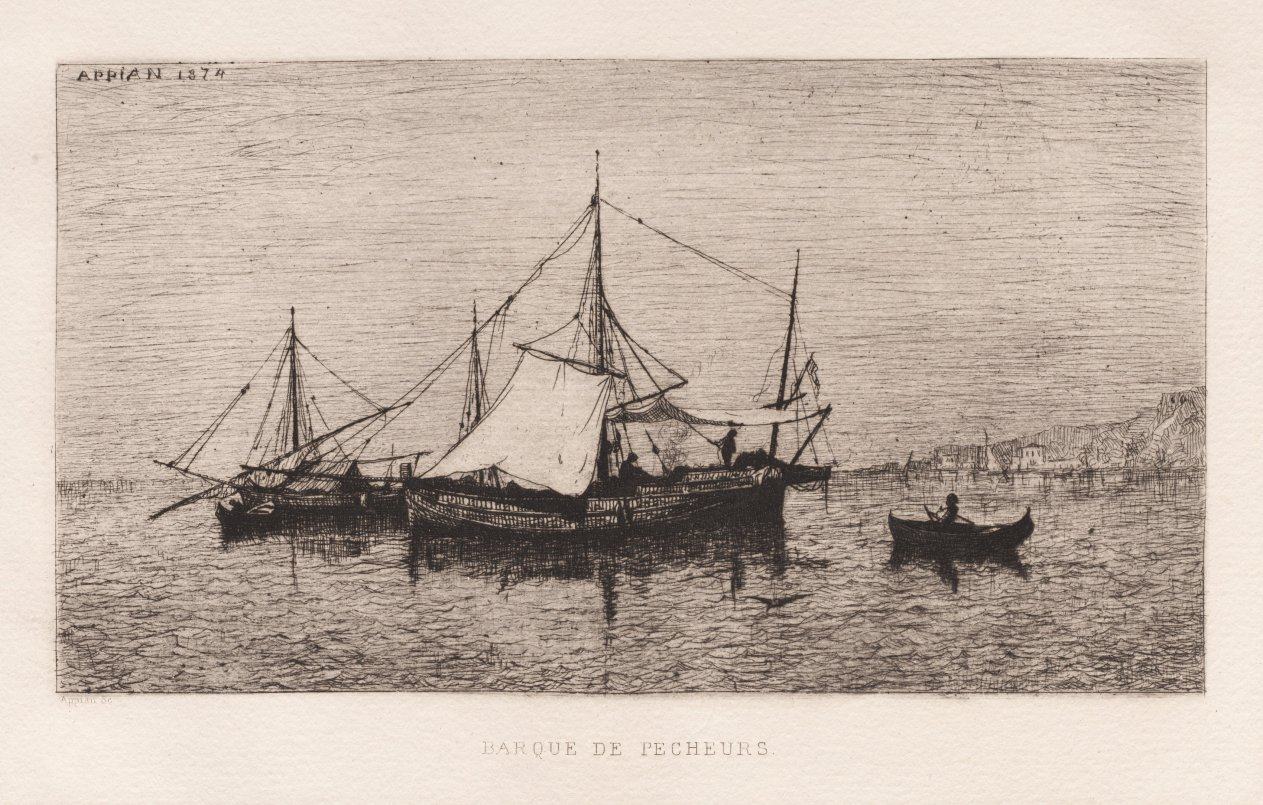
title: Fishing Boat/Coastal Shipping Boat (Italian Coast) (Barque de Pecheurs/Barque de Cabotage (Côtes d'Italie)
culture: France, 19th century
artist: Adolphe Appian (French, 1818–1898)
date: 1874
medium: etching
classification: Print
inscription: inscribed upper left in plate: APPIAN 1874